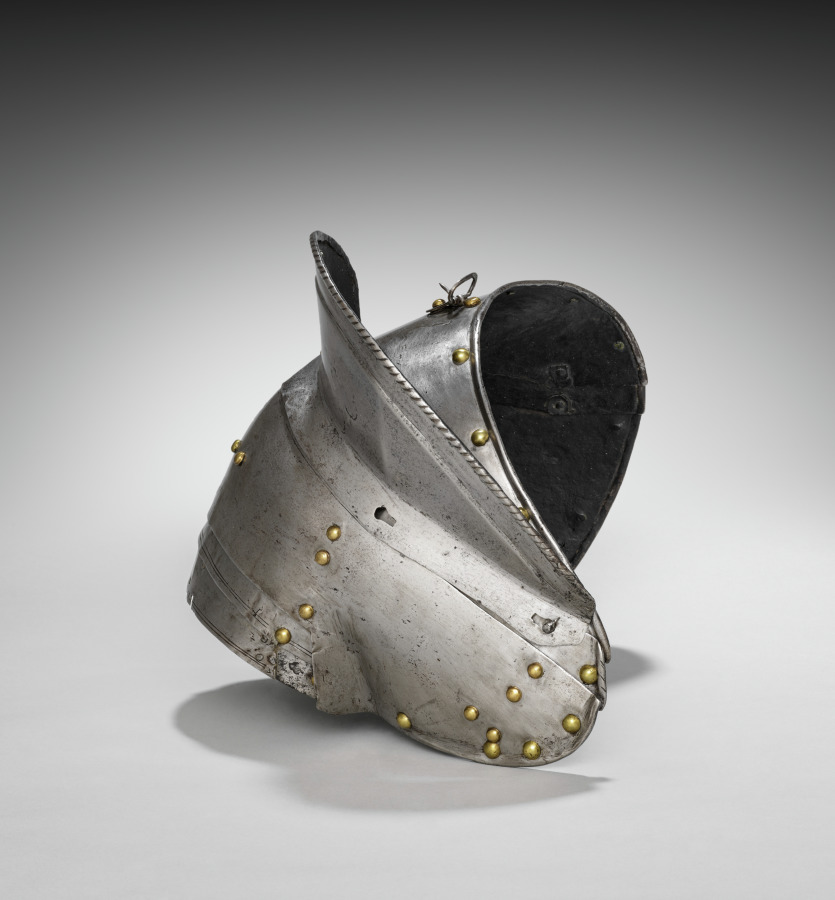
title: Pauldron (proper right) and Gardbrace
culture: South Germany, 16th century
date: c. 1560–1580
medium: steel, leather straps, brass rivets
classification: Arms and Armor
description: This armor was developed for the joust--a sporting combat between two mounted contestants. Although all of the elements of this armor date from the same period, they are not all from the same suit. This armor is thus called "composed." It also shows the asymmetry of jousting armor. The participants rode along a wall-like barrier known as a "tilt" with their left sides facing one another. Consequently, armor on that side of the body had to be thicker. Note the large plate (grandguard) over the left shoulder for extra protection. Also, the breathing holes in the helmet were placed on the right side (farthest from an opponent's lance) to avoid injuries from splinters. The bracket attached to the right breastplate is called the lance-rest, a shock-absorbing support designed to accommodate the lance when "couched" under the right armpit.